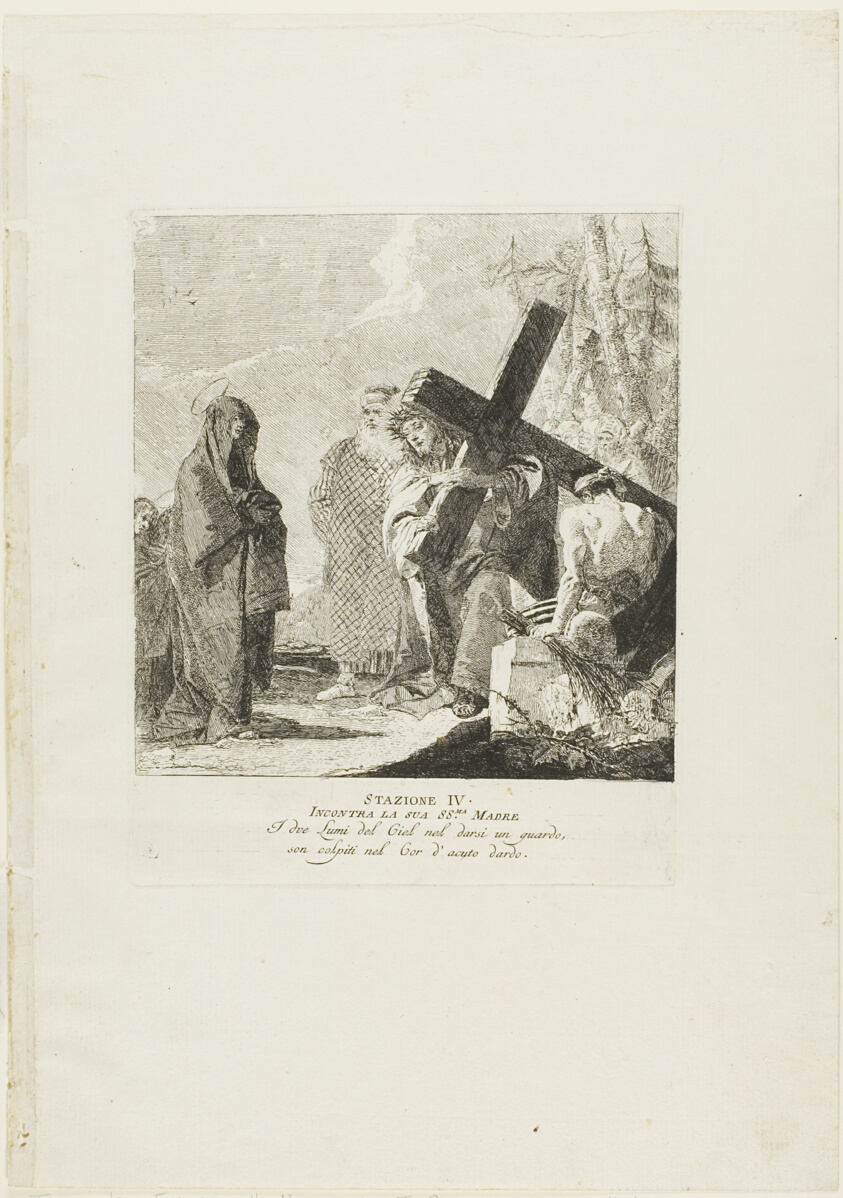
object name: Print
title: Christ Meets his Mother, plate four from Stations of the Cross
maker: Giovanni Domenico Tiepolo (Italian, 1727-1804)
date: c. 1748, published 1749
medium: Etching on paper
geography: Italy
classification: etching; print; prints and drawing